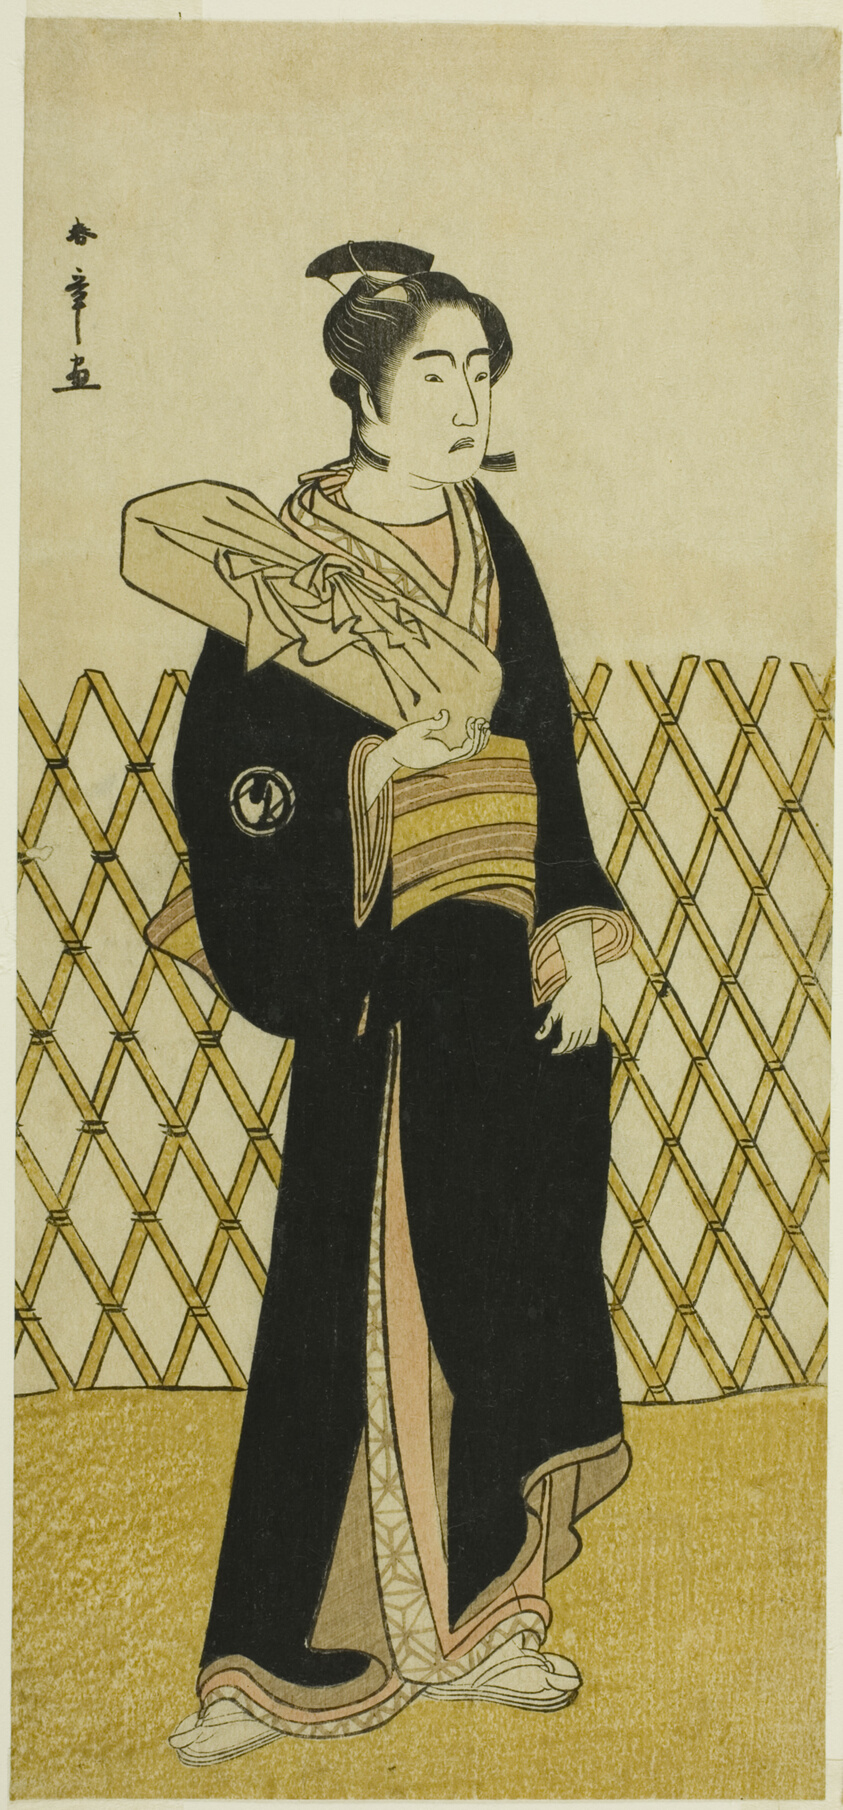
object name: Print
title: The Actor Sawamura Sojuro III as the Hairdresser Jirokichi in the Play Shida Choja-bashira, Performed at the Nakamura Theater in the Eighth Month, 1781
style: Japanese (culture or style)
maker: Katsukawa Shunsho 勝川 春章; Japanese, 1726-1792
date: c. 1781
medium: Color woodblock print; hosoban; left sheet of diptych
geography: Japan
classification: woodblock print; print; asian art